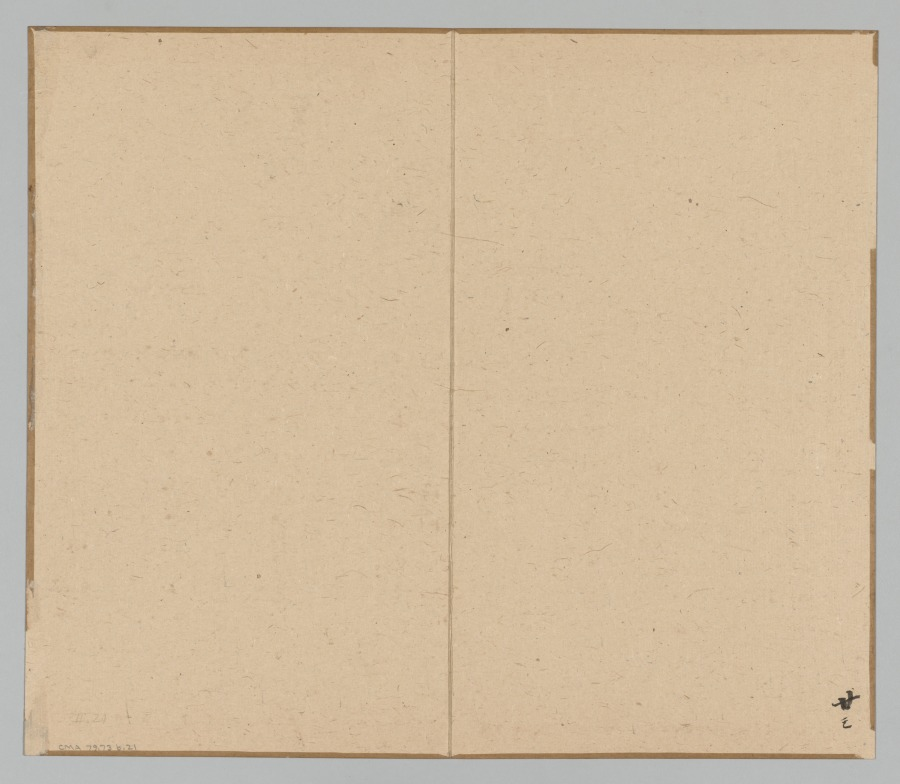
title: Reverberations of Taiga, Volume 2 (leaf 21)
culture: Japan, Edo period (1615–1868)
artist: Aoki Shukuya (Japanese, d. 1802)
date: mid- to late 1700s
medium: double-leaf from a pair of albums; ink and light color on paper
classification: Portfolio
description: Traditionally, young painters in Japan began their studies with an established master-painter. The master's compositions invariably became models that the apprentice copied to learn various ink and brush techniques. Shukuya was a pupil of the famous Kyoto artist Ikeno Taiga, whose style is reflected in these sketches of rocks, trees, and mountains.